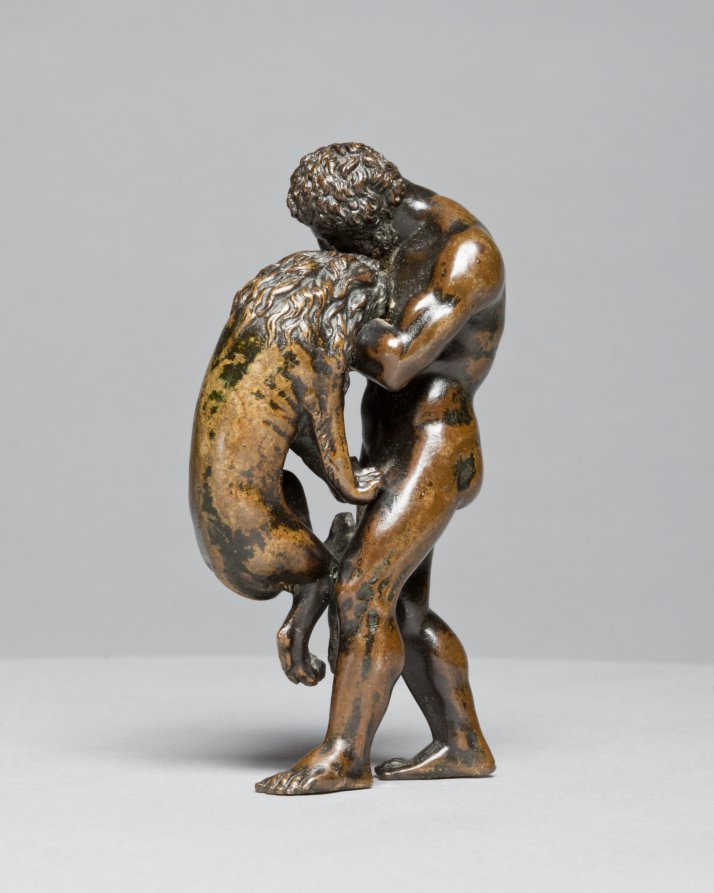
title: Hercules and the Nemean Lion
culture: Italy or France, 16th century or later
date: 1500s or later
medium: bronze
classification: Sculpture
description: The original owner of this work would have understood that this scene referred to the entire story of Hercules, the demi-god who had to accomplish twelve labors. The lion is named after the city of Nemea, near Corinth, a monstrous beast sent by the goddess Hera to wreak havoc on the area. After killing the lion, Hercules wore his pelt, commonly seen in other representations of the hero.